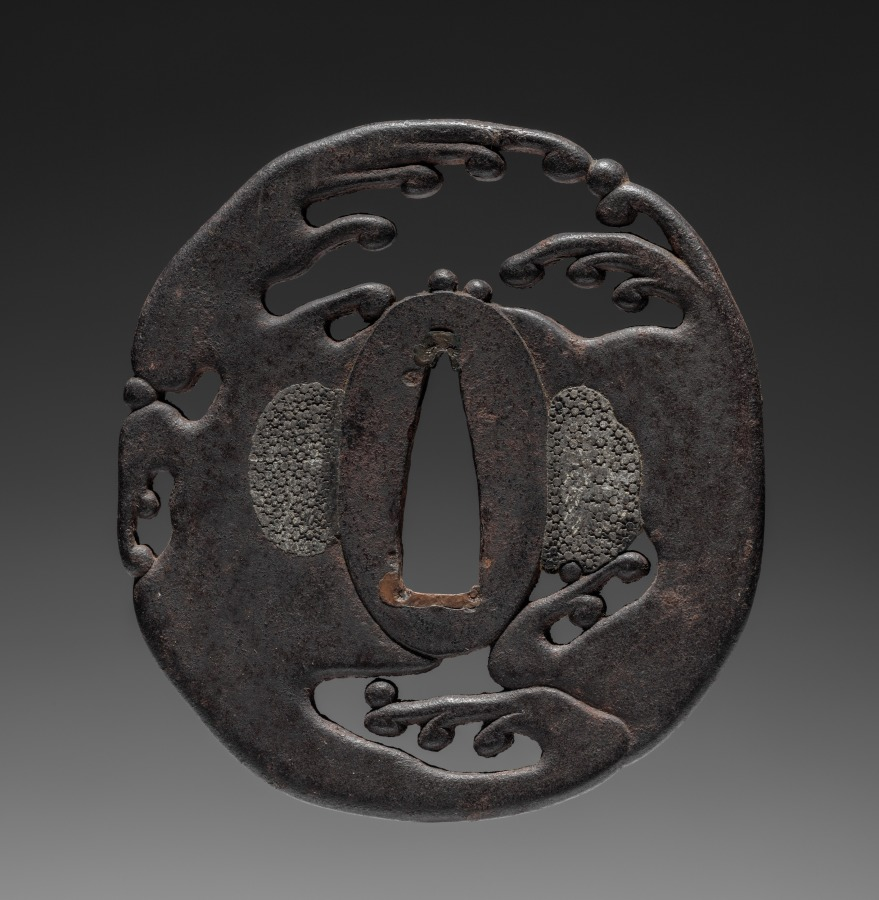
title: Sword Guard (Tsuba) with Rough Waves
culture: Japan, Edo period (1615–1868)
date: 1615–1868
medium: iron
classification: Arms and Armor